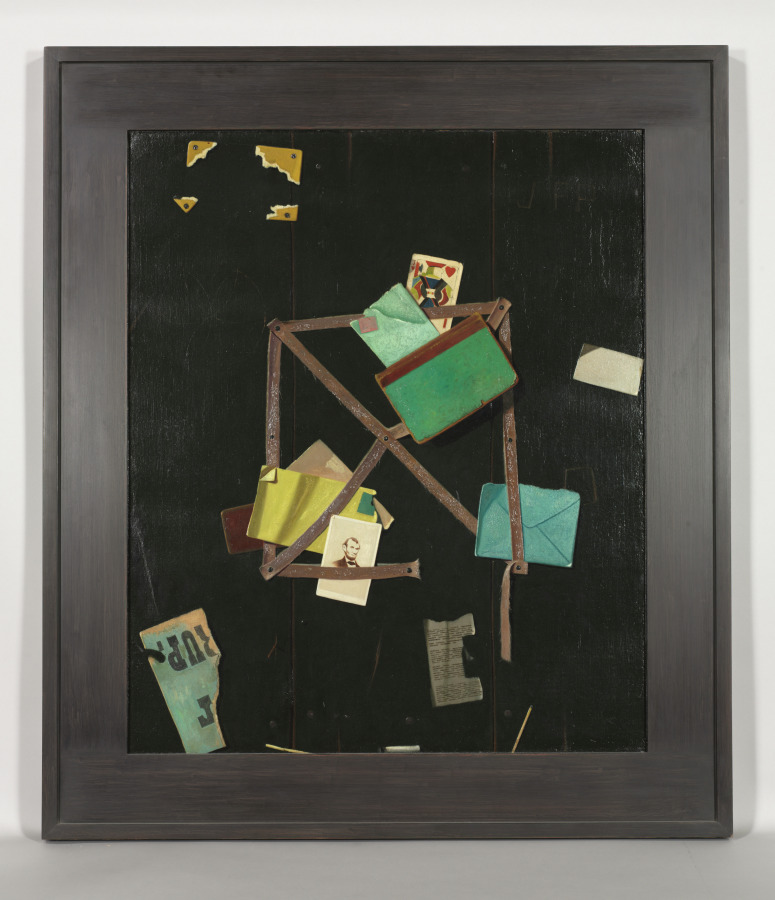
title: Card Rack with a Jack of Hearts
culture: America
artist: John F. Peto (American, 1854–1907)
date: c.1895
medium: oil on canvas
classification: Painting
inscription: Signed upper right: "J F P"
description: Like modern-day bulletin boards, card racks were used to gather newspaper clippings, scraps of paper, and other ephemera in one place. Although it is unclear if the items seen here carry symbolic meaning, they nevertheless demonstrate the human desire to collect and recollect. Their tattered state and frayed edges further evoke a sense of memory and nostalgia. The illusionistic quality of Peto’s pictures makes the objects appear to exist in real space. Even the cigarette butt perched at the bottom looks ready to be plucked from the painting’s frame.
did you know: Living in a New Jersey resort town, Peto sold some of his paintings to tourists.